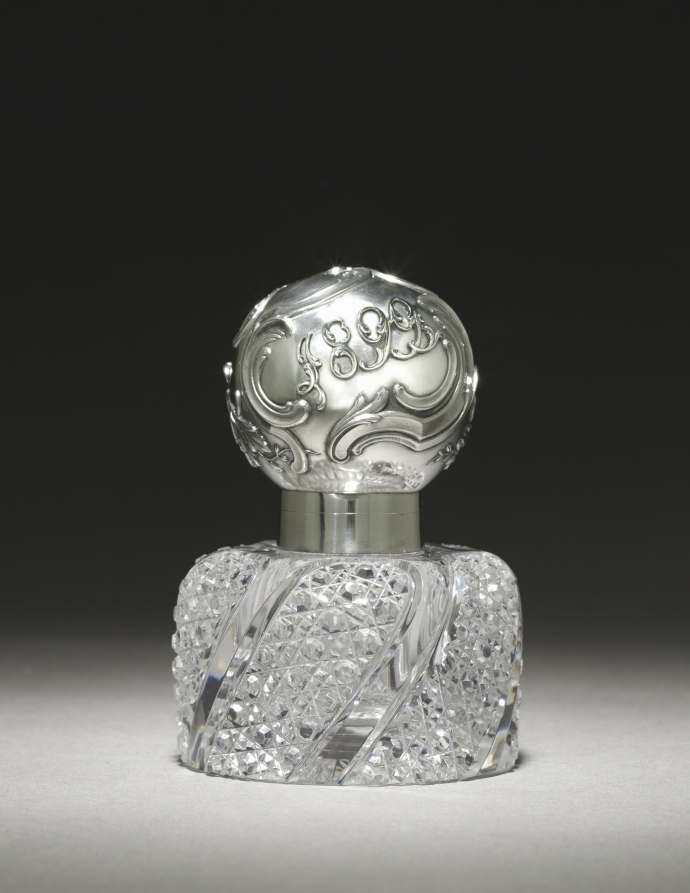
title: Inkwell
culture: Russia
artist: House of Fabergé (Russian, 1842–1918)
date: c. 1899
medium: cut glass and silver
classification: Glass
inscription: mark on cover: initials for Carl Fabergé (in Cyrillic)